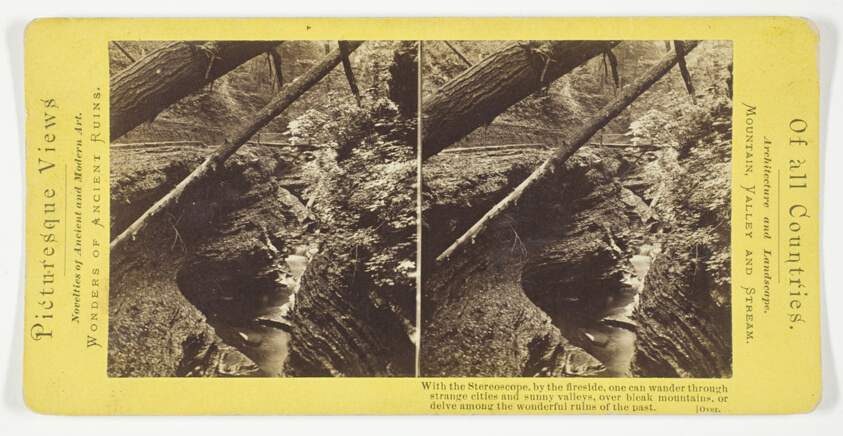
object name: Photograph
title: Mountain, Valley and Stream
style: 19th century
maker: Artist unknown; American, late 19th century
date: 1875/99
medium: Albumen print, stereo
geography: United States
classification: photography; photograph